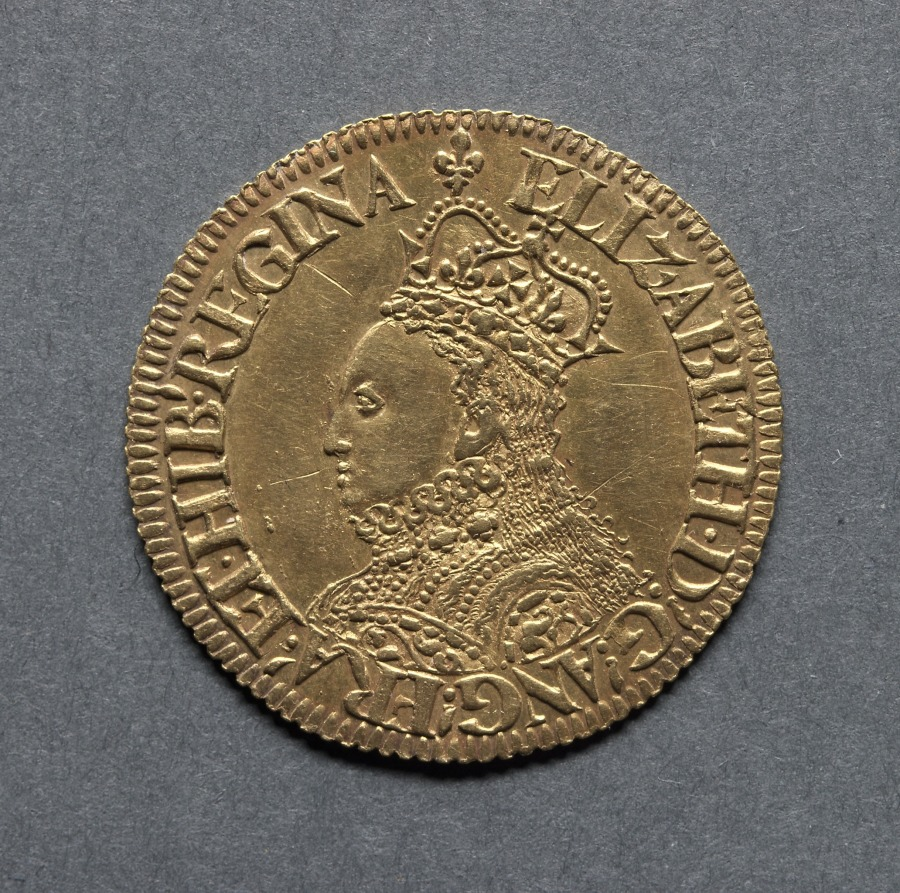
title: Half Pound: Elizabeth I (obverse); Crowned Shield of Arms (reverse)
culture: England, Elizabeth I, 1558-1603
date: 1558–1560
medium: gold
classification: Coins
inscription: ELIZABETH • D : G : ANG : FRA : ET • HIB : REGINA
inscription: SCVTVM • FIDEI • PROTEGET • EAM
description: This is a fine example of a rare piece, produced by a new process. In about 1560 an attempt was made to introduce coins made with the French screw press. The coins are called mill money, a term derived from the use of water and horse mills used to supply power. The machinery included a rolling press, driven by the mill, a cutting punch, and a screw press for stamping the design on the coin. While the screw press coins are far superior to hammered coins in the point of accuracy of shape and weight, the workmen at the mint put up every possible objection because they were afraid their livelihood was in danger. Eloye Mestrell, who brought the press over from France, was a scoundrel who had once worked for the Paris mint. He was an easy prey to hostility and finally ended up on the gallows, having been convicted of counterfeiting. No more is heard of the screw press until the reign of Charles I when a greater Frenchman, Nicholas Briot, was given employment in the government mint. The workmanship on these milled coins of Mestrell was excellent and the coins are beautifully detailed.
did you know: The technology of the French screw press allows greater detail to be viewed, such as the queen's bejeweled dress and long locks flowing out of her crown and down her back.